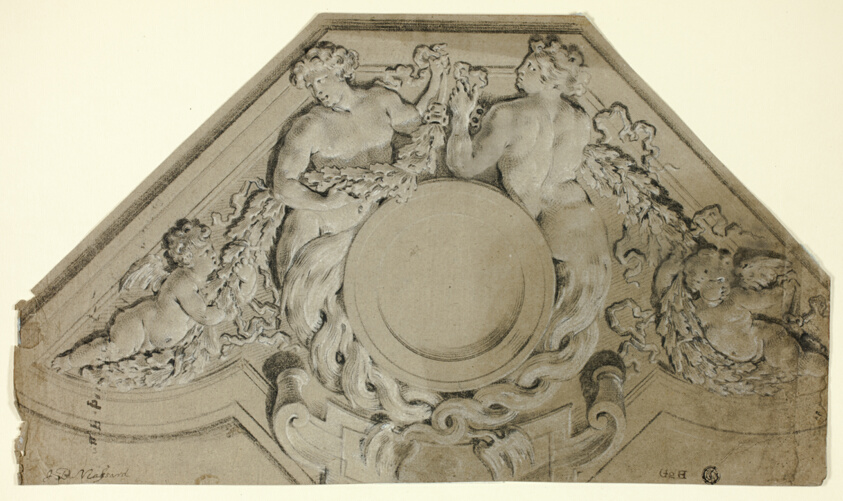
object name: Drawing and Watercolor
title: Soffitt Design with Anthropomorphic Couple and Putti (recto); Putto and Dolphin (verso)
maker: Jean Baptiste Louis Massard (French, 1772-1810)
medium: Black crayon with black chalk, heightened with white chalk, on brown laid paper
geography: France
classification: chalk; drawings (visual works); prints and drawing